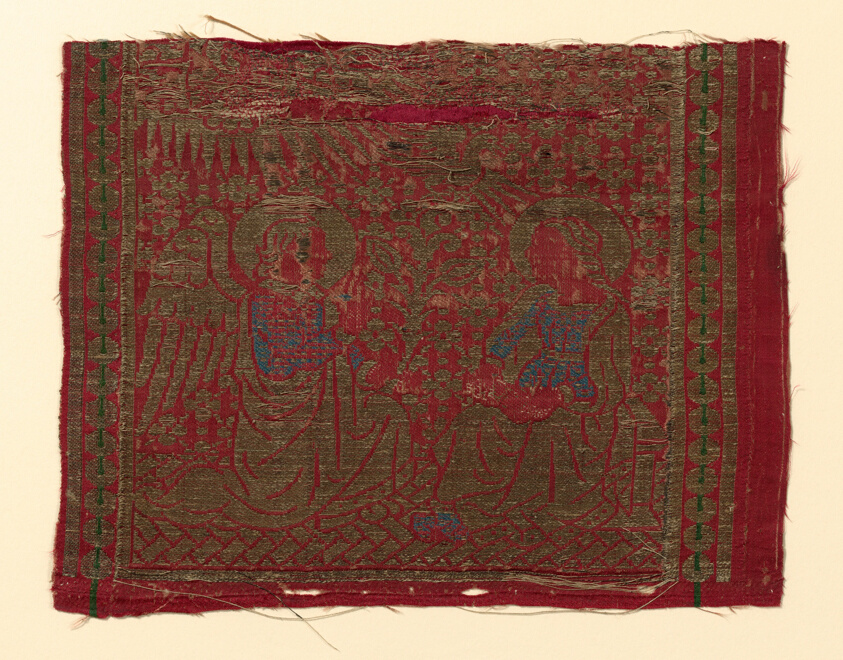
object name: Textile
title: Fragment (From an Orphrey Band)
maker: Italy, Florence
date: 1450/1500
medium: Silk and gilt-animal-substrate-wrapped linen, warp-float faced satin weave with supplementary patterning wefts and supplementary brocading wefts tied by secondary binding warps in twill interlacings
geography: Florence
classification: textile; weaving; liturgical